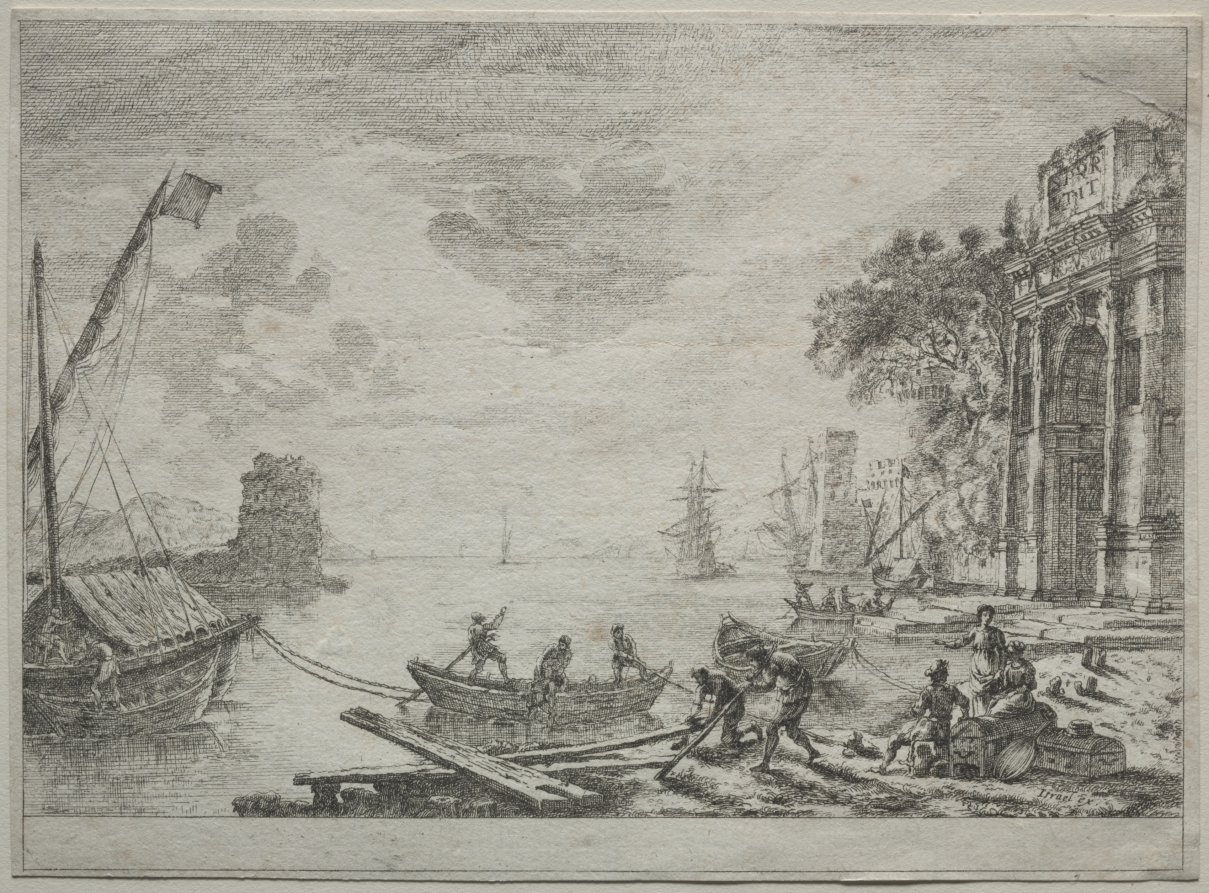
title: The Sunset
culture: France, 17th century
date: 1600s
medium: etching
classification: Print